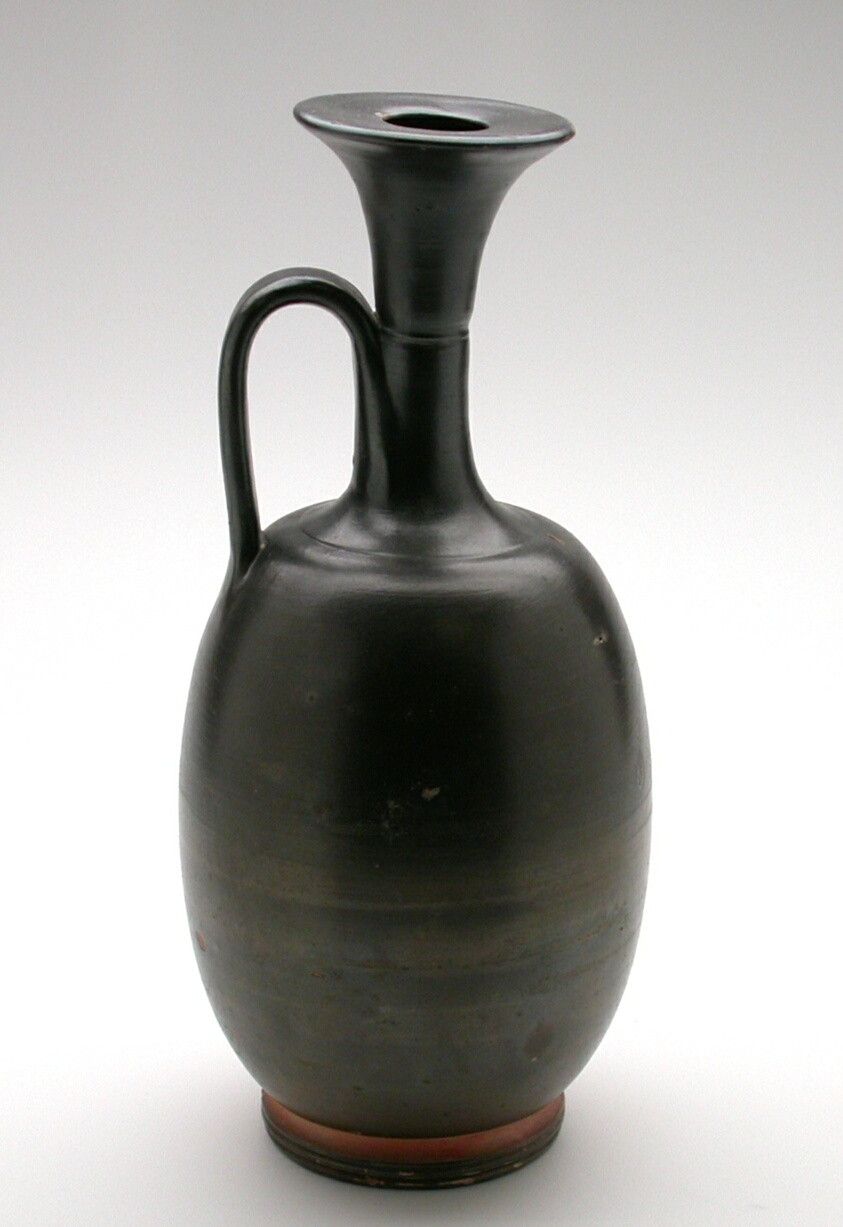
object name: Vessel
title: Lekythos (Oil Jar)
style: greek, campanian, ancient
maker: Greek; possibly Campania, Italy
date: about 400 BCE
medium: terracotta, black-glaze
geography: Ancient Greece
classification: vessel; ceramics; ancient art